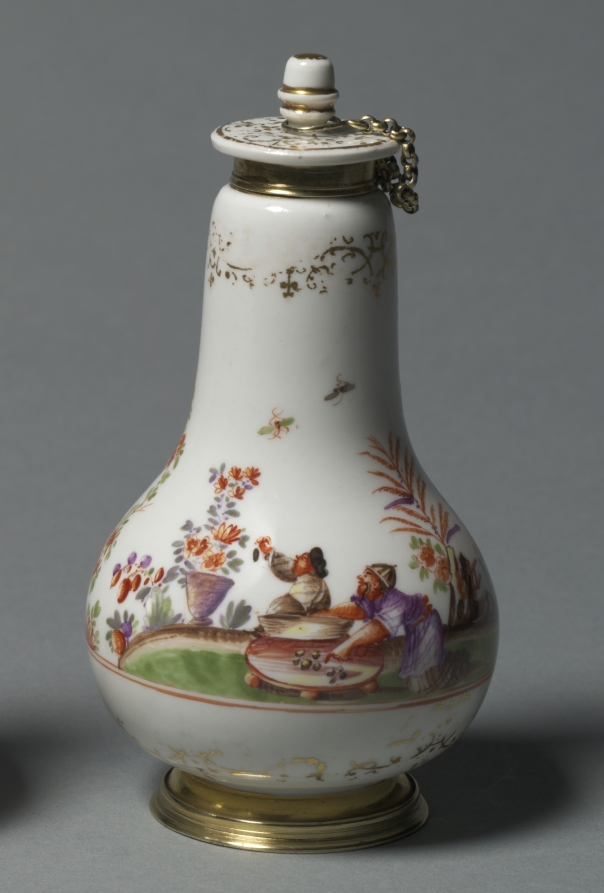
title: Covered Flask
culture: Germany, Meissen, 18th century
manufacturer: Meissen Porcelain Factory (German, est. c. 1710)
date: c. 1720–1723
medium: porcelain with gilt metal mounts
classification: Ceramic